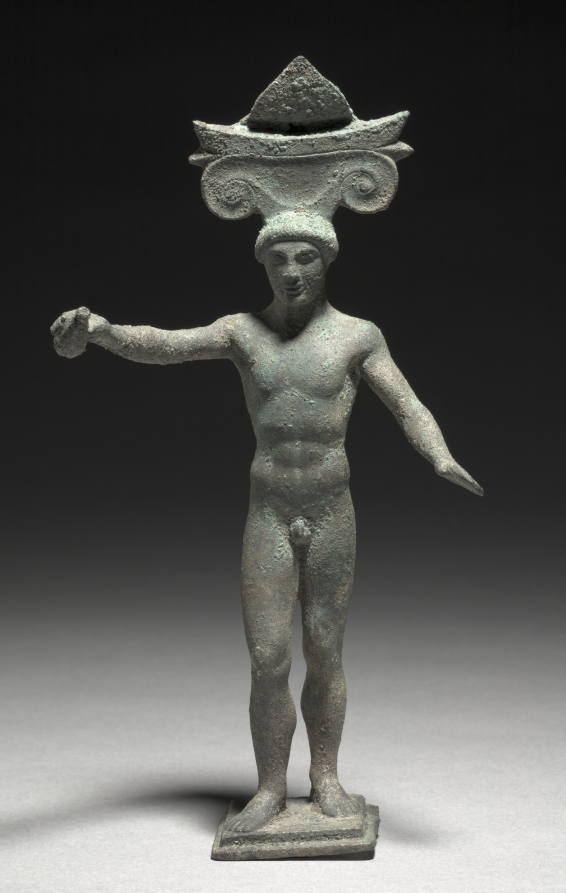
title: Mirror Support: Athlete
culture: South Italy, Locri (?), Greek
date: 460–450 BCE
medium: bronze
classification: Sculpture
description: A muscular nude youth strides forward on a square metal plate with his arms outstretched. The plate and the volute decoration that adorns his head suggest that this statuette was the support for a mirror. The youth is likely an athlete, as he holds an alabastron or oil vessel in his right hand. The oil may be an offering to the gods for victory, or to rub onto the skin to protect and beautify his body before an athletic contest. The mirror was made separately and would have been attached to the triangular tang above the athlete’s head.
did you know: Most Greek mirror stands depict female figures, but this one depicts a male.